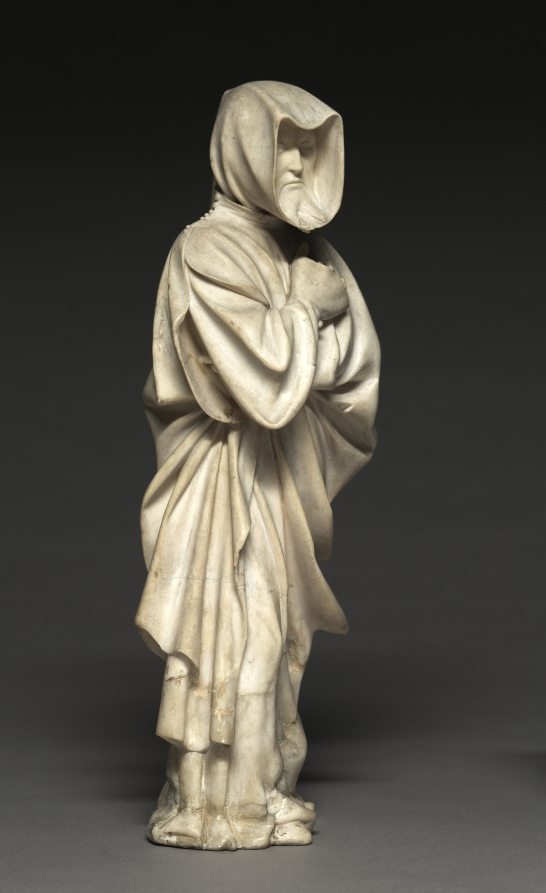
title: Mourner from the Tomb of Philip the Bold, Duke of Burgundy (1364–1404)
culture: Netherlands, active Dijon, 15th century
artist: Claus de Werve (Netherlandish, 1380–1439)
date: 1404–10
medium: vizille alabaster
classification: Sculpture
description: This figure comes from the tomb of Duke Philip the Bold from the church of Champmol near Dijon (Burgundy, France). Philip, who founded the monastery and designated it as his burial place, hired the best artists, many of whom came from the Netherlands. While the commission was given in 1381, the work was not completed until 1410, six years after the duke’s death. This mourner is unusual for the time because it is not carved as a static low relief on the pedestal of the tomb but interacts with the viewers and their fellow procession members. The lifelike quality of the figure is due in large part to the alabaster. Its softness allowed artists to carve details into the material, and the transparent, milky white stone could also be polished to a high gloss.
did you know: A plaster cast of this mourner decorates the empty niche in the Tomb of Philip the Bold in Dijon, France.